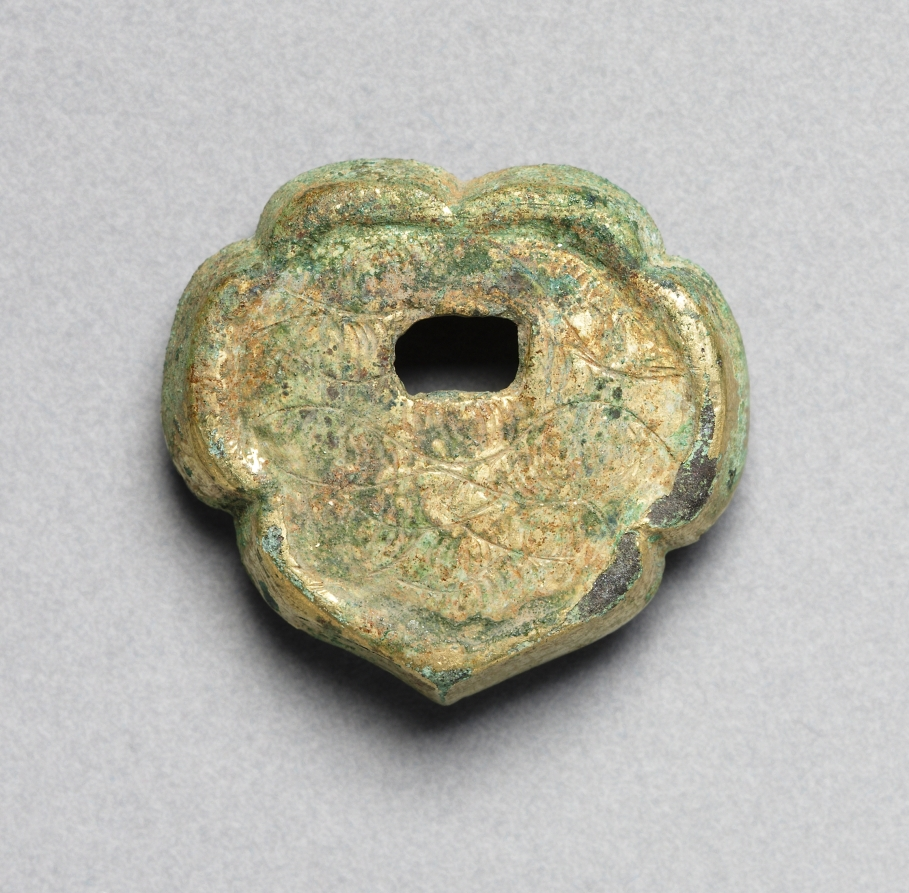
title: Nail Cover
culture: Korea, Goryeo dynasty (918–1392)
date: 918–1392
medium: bronze gilt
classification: Metalwork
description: Metallurgy advanced remarkably in the Goryeo period (918–1392), explaining why a large quantity of gilt-bronze artifacts were found in burial sites. This particular object was used to decorate a wooden coffin.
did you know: This particular object was used to decorate a wooden coffin.